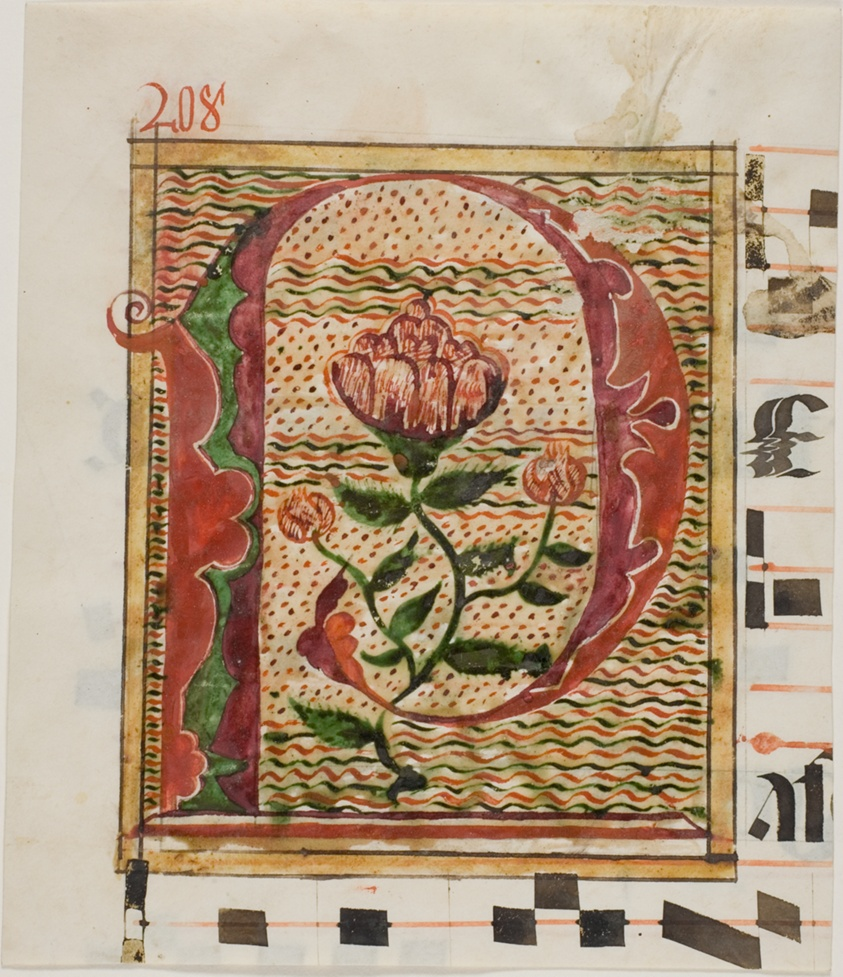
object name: Drawing and Watercolor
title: Decorated Initial "P" with Flowers from a Manuscript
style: medieval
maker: European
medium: Manuscript cutting in tempera and colored inks, with Latin inscriptions in brownish black and red inks, ruled in red, on vellum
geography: Europe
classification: tempera; manuscript; drawings (visual works); prints and drawing